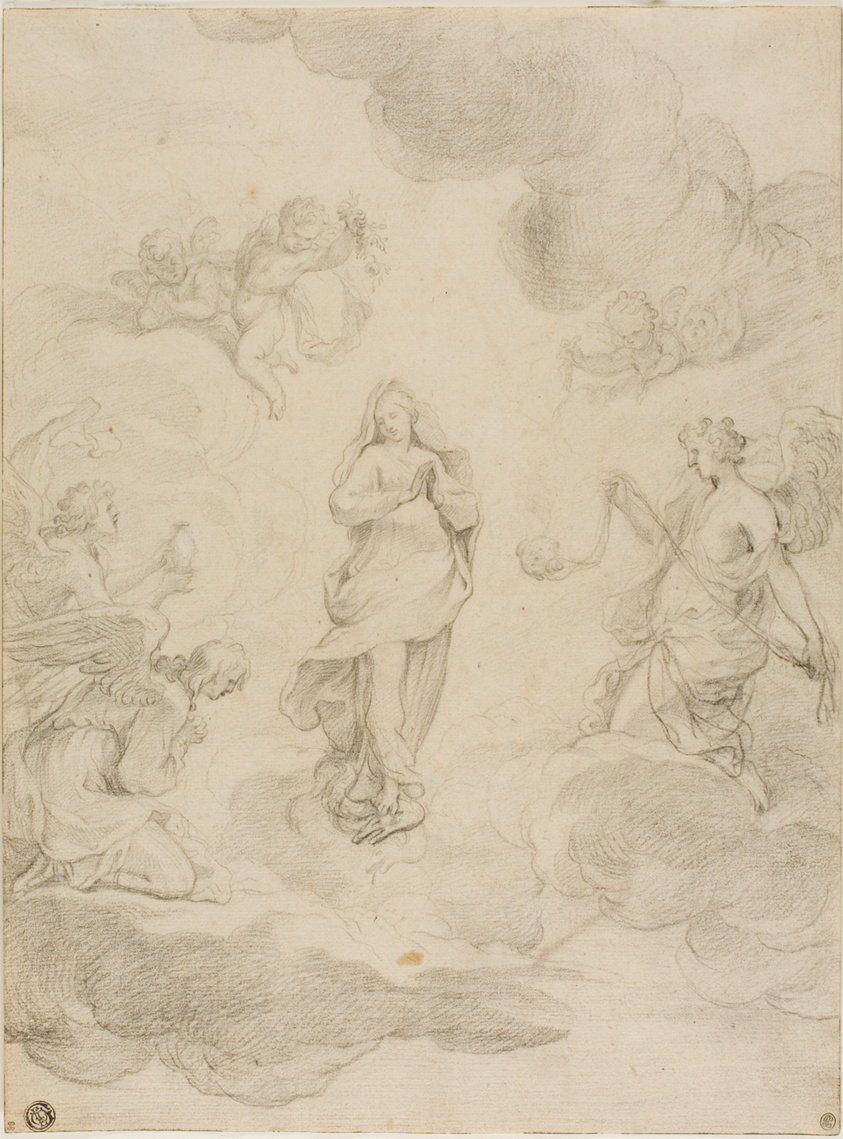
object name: Drawing and Watercolor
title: Adoration of the Virgin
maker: Possibly Antoine Rivalz; French, 1667-1735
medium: Black chalk on cream laid paper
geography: France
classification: chalk; drawings (visual works); prints and drawing